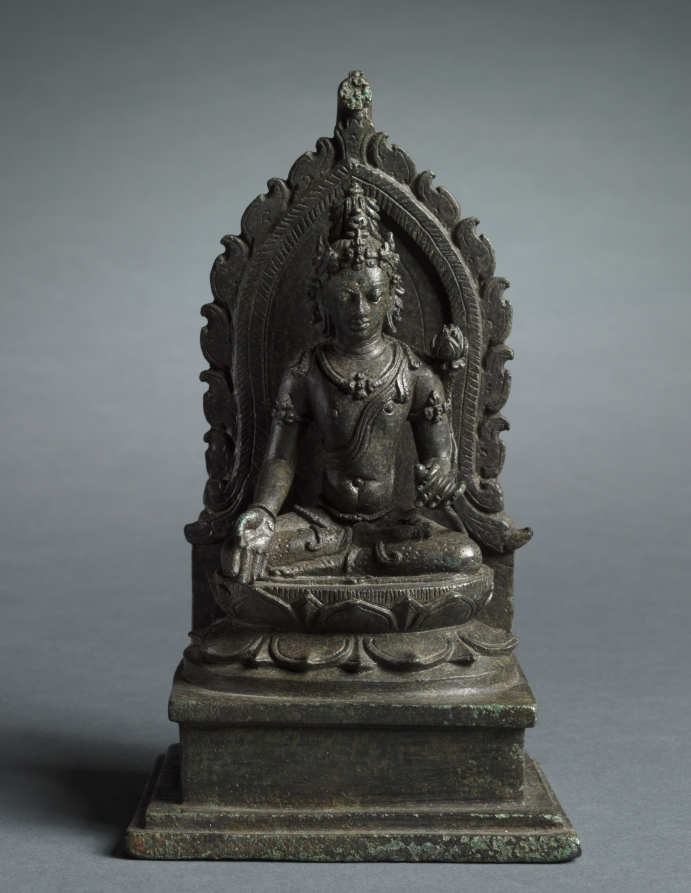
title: Seated Avalokitesvara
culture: Central Java, 9th century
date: 800s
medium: bronze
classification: Sculpture